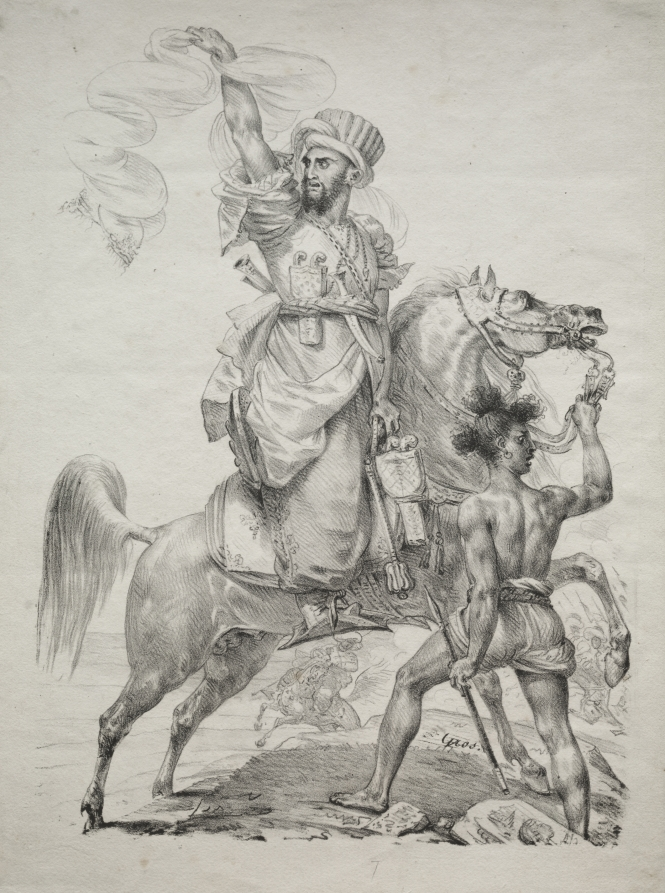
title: A Mameluke Chief on Horseback Signaling for Help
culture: France, 19th century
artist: Antoine-Jean Gros (French, 1771–1835)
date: 1817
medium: lithograph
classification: Print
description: Gros specialized in large battle paintings memorializing the feats of Napoleon (1769-1821). This Orientalist military subject records Napoleon's campaign in Egypt against the British Empire. It also demonstrates how spontaneously the artist could draw on the lithograph stone.